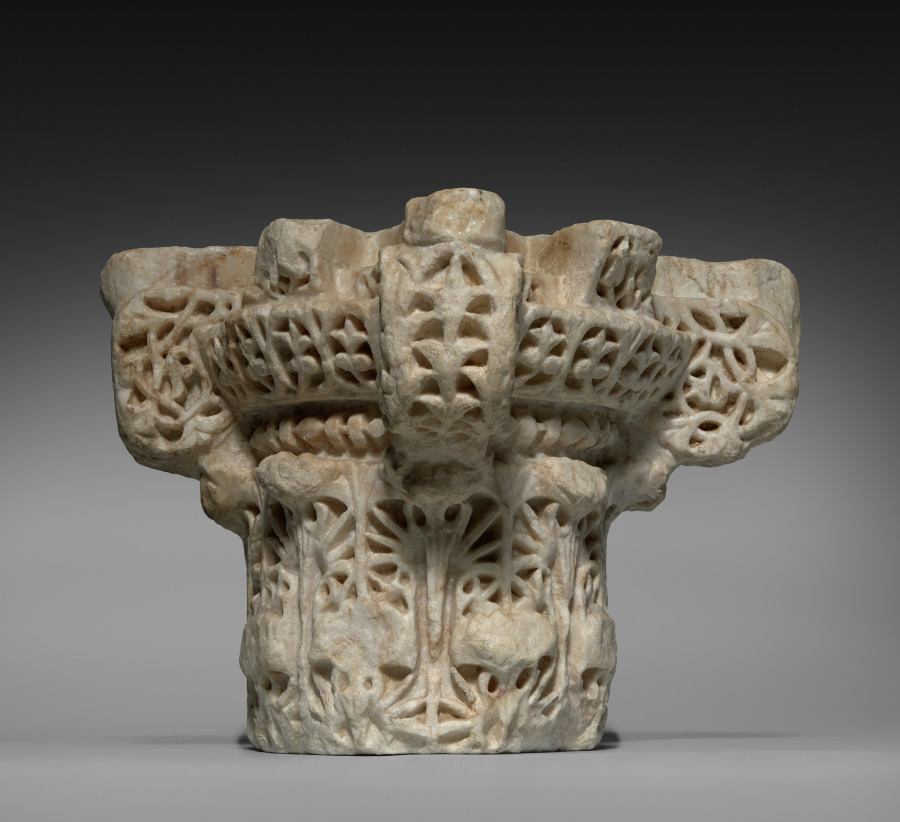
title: Column Capital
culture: Spain, Cordoba, Madinat al-Zahra, Spanish Umayyad period (756–1031)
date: c. 960–76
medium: Marble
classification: Sculpture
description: This capital comes from the palatial city of Madinat al-Zahra near Cordoba (Spain) which was begun by caliph Abd al-Rahman III (r. 912–61) around 936. Large parts of the Iberian Peninsula were then under Islamic rule and experienced a cultural flowering. The city, destroyed already in 1010, was the most magnificent palace complex in Europe at the time.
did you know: In the mid-1800s the ruins of Madinat al-Zahra were rediscovered and became the source of great fascination as people imagined a palace like that in the stories of One Thousand and One Nights.